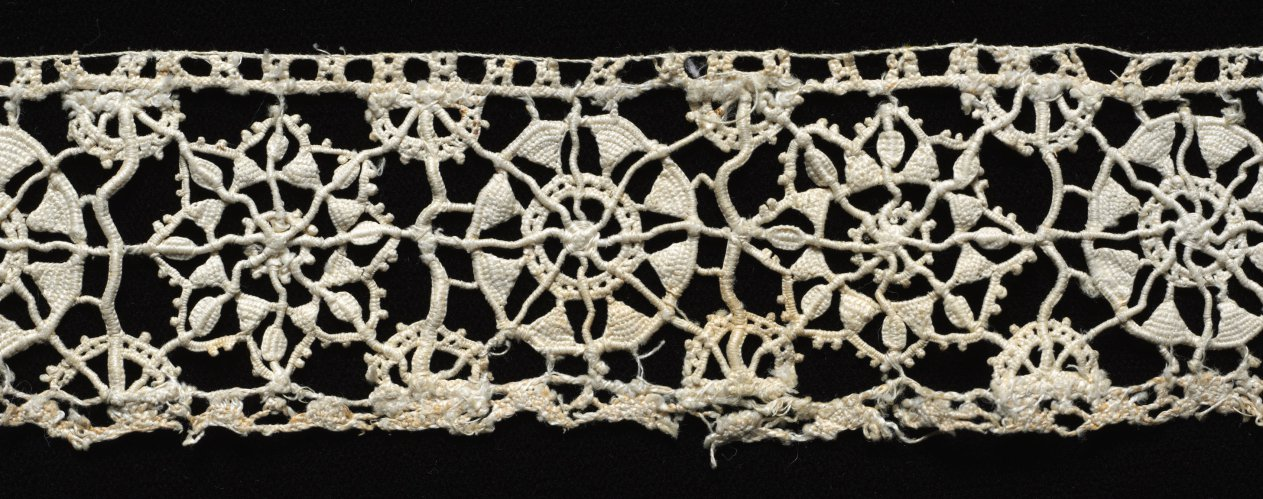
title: Lace Fragment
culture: Italy, Venice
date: 1500s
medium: Linen: needle lace (Reticella) insertion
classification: Lace